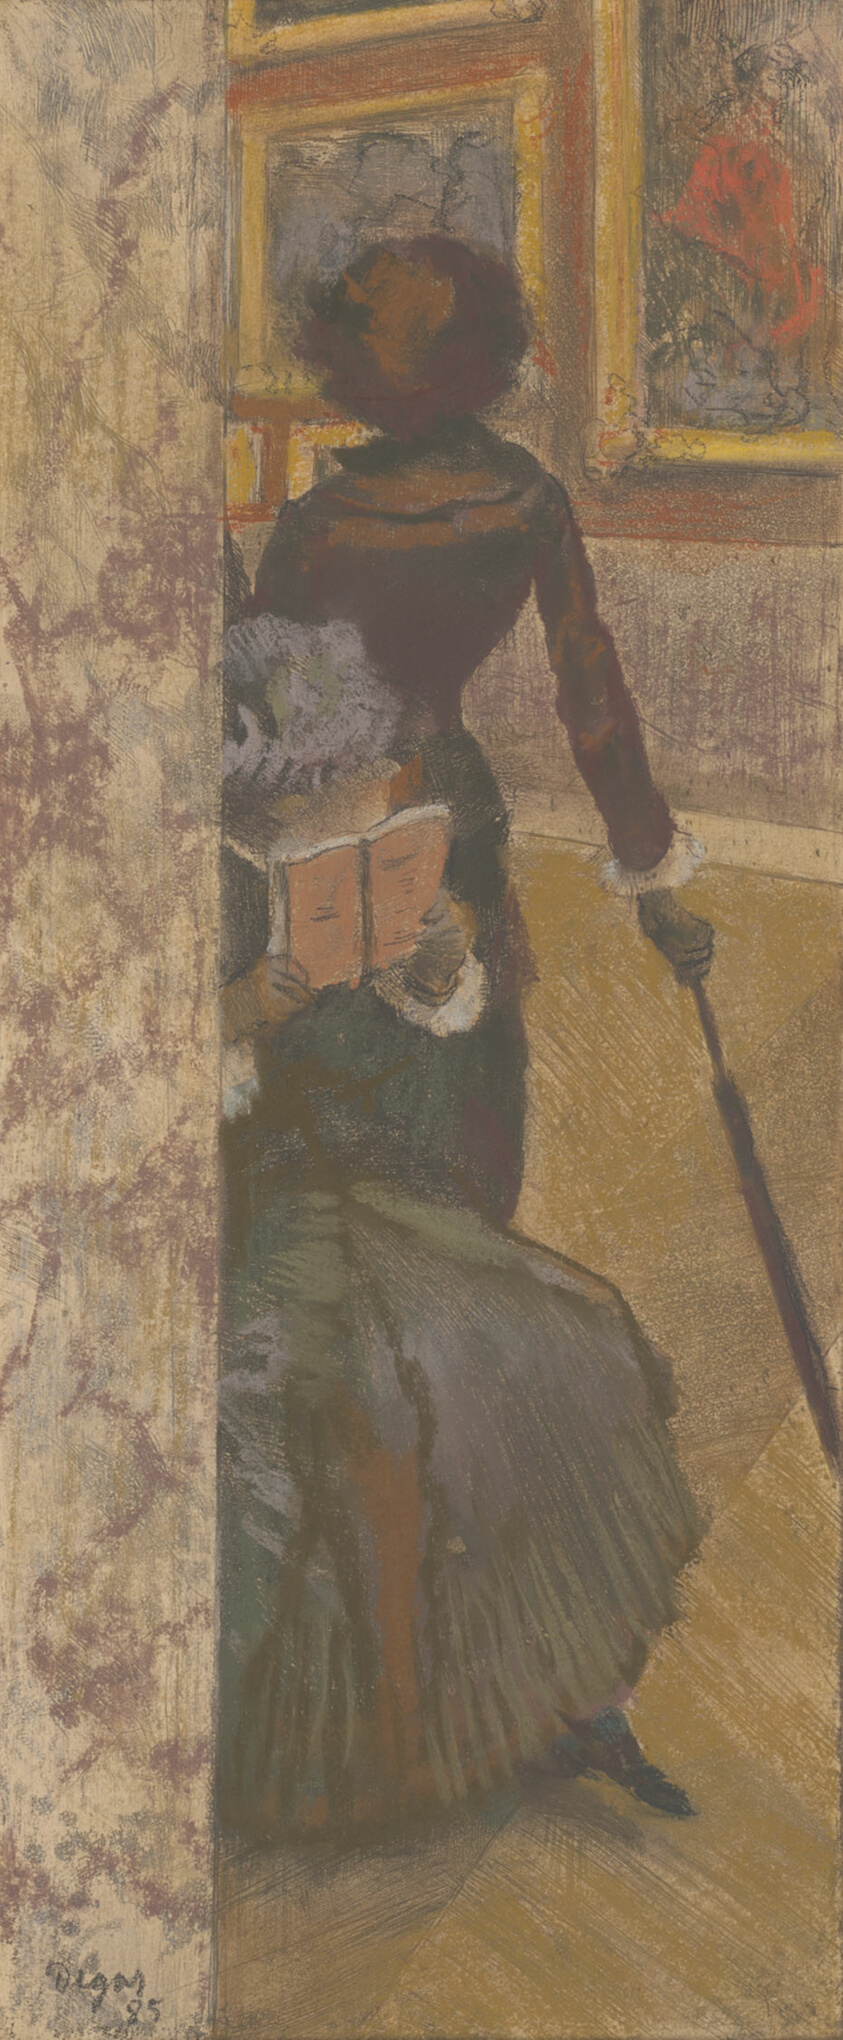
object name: Print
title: Mary Cassatt at the Louvre: The Paintings Gallery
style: Impressionism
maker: Edgar Degas; French, 1834-1917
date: 1885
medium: Pastel, over etching, aquatint, drypoint, and crayon électrique on tan wove paper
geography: France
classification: etching; print; prints and drawing; paper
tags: leisure, women, urban life